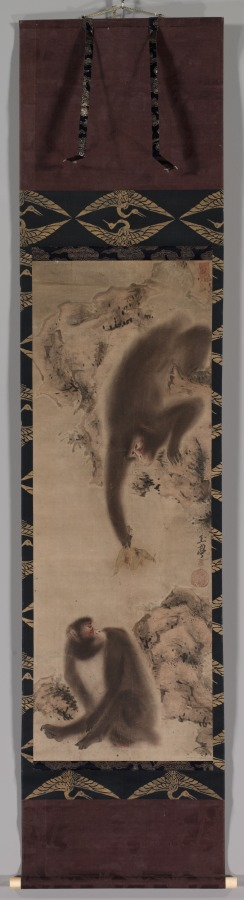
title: Monkeys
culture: Japan, Edo period (1615–1868)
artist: Gyokutei Katsu (Japanese)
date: c. 1800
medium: hanging scroll; ink on paper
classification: Painting